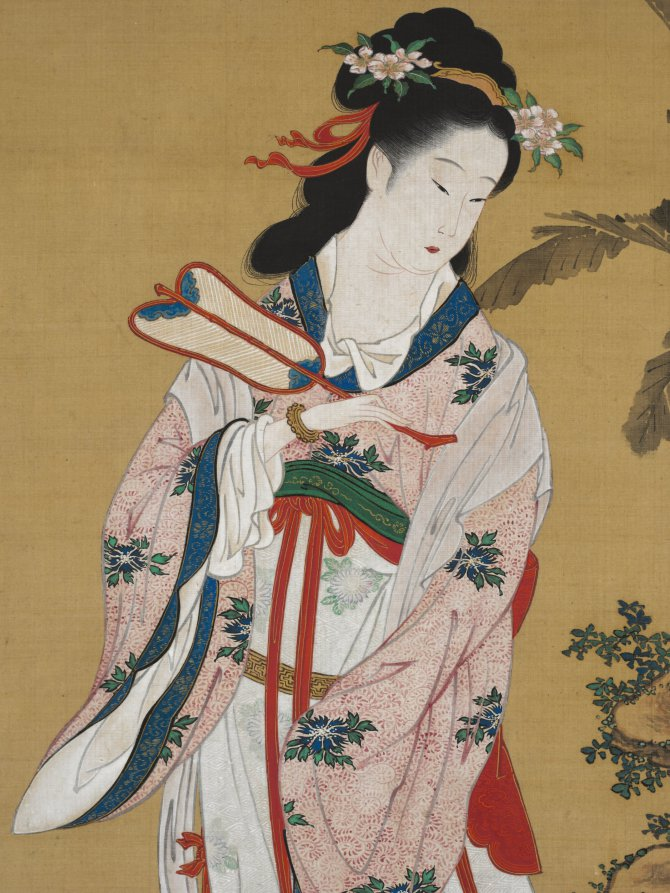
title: Chinese Beauty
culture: Japan, Edo period (1615–1868)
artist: Kubo Shunman (Japanese, 1757–1820)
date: late 1700s–early 1800s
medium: Hanging scroll; ink and color on silk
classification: Painting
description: Ukiyo-e artists’ exploration of beautiful people extended to figures from other lands. Here, an elegant Chinese palace lady holding a fan stands before a banana plant. The poem at the top is written in a Japanese appropriation of Chinese called kanbun. Based on its imagery of a palanquin (an enclosed couch with poles used for carrying passengers), silk fan, and autumn winds, it may allude to the story of Lady Ban (about 48 BC–about AD 2). A Chinese beauty famous for her scholarly achievements, Ban was once consort to an emperor but later lost his favor. In a poem attributed to her, she compared herself to a used silk fan put away in autumn.